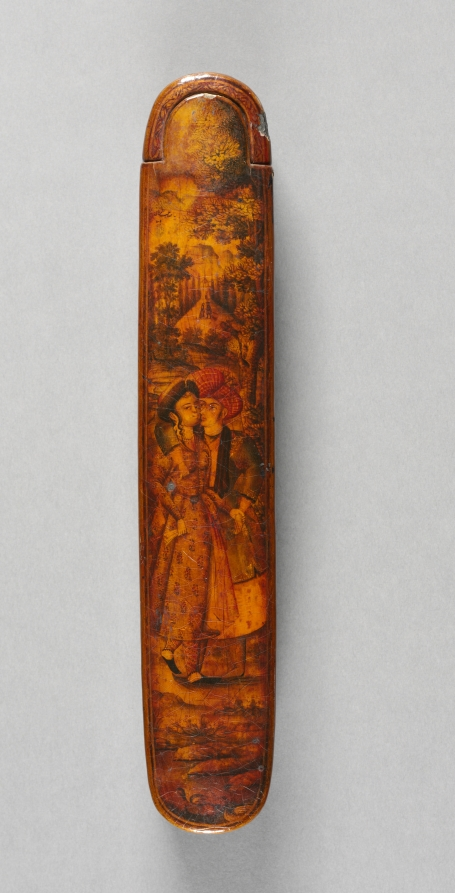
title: Pen and Ink Box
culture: Iran, probably Isfahan, Safavid period (1501–1722)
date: 1667–98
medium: Varnished lacquer and opaque watercolor over papier-mâché, ink, and copper alloy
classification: Lacquer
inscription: 1109